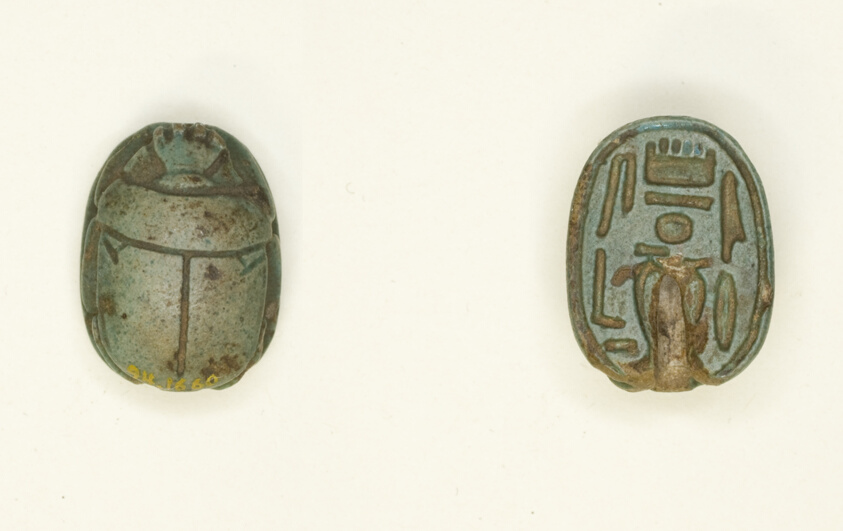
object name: Costume and Accessories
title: Scarab: Wish Formula (?)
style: egyptian, middle kingdom, ancient, new kingdom, second intermediate period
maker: Egyptian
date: Middle Kingdom–New Kingdom, Dynasties 18–20 (about 1550–1069 BCE)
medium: Glazed steatite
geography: Egypt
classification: scarab; ancient art; costume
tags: Hieroglyphs, gods (deities), insects